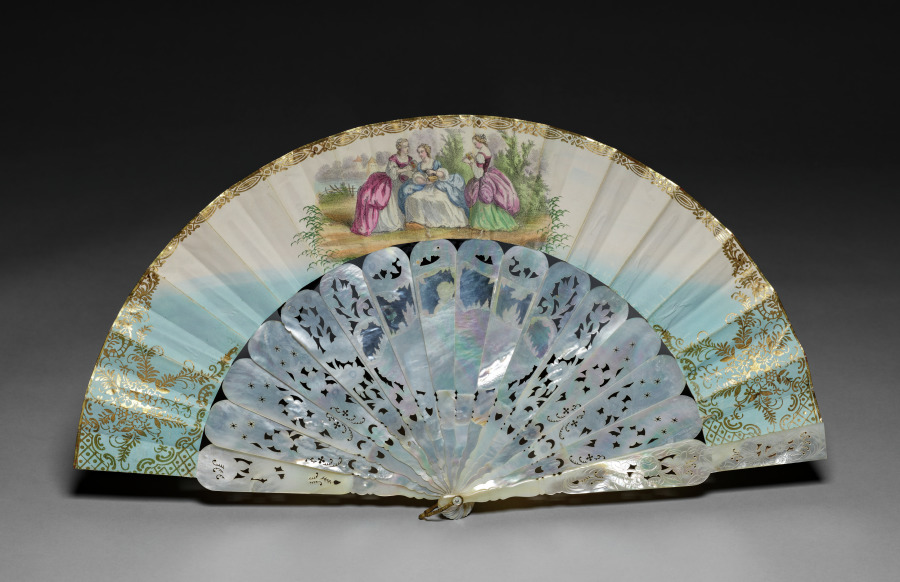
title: Fan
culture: Europe, mid-19th century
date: mid 1800s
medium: ivory with gilding, painted and gilt paper, painted silk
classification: Miscellaneous